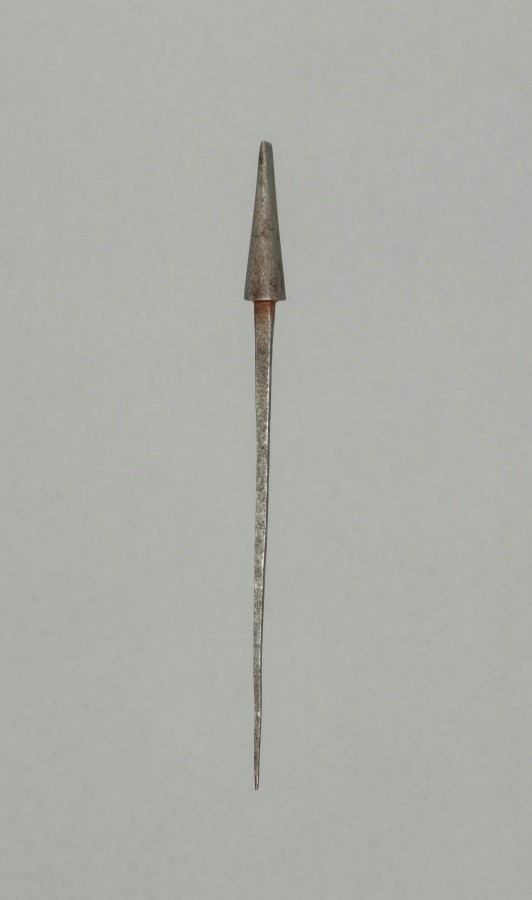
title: Arrow Point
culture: Japan, Edo period (1615–1868)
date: 1700s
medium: steel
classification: Arms and Armor